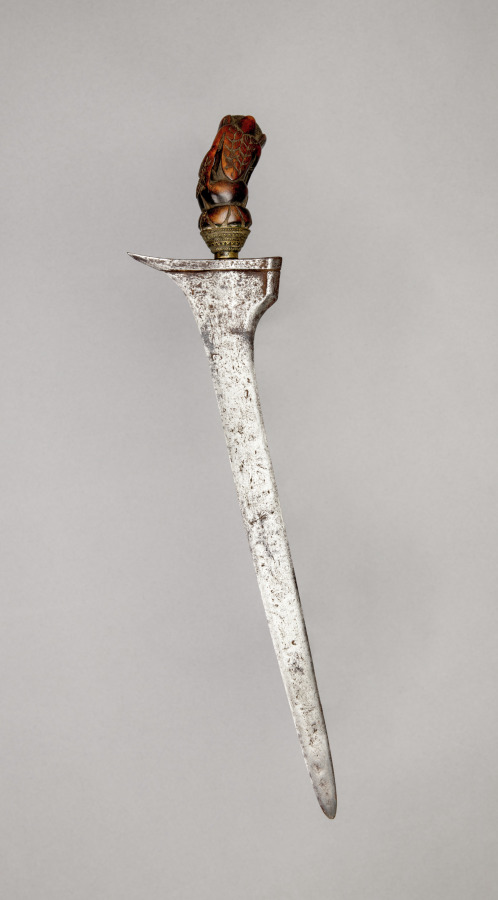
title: Sword (Kris)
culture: Java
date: 1800s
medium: iron with carved wooden handle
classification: Arms and Armor